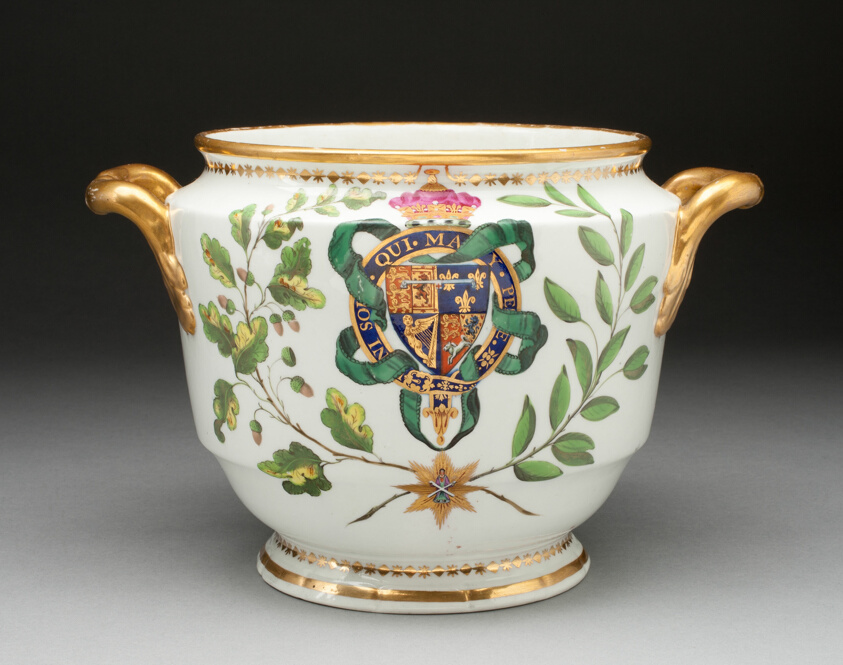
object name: Ceramics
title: Wine Cooler from the Duke of Clarence Service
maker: Worcester Porcelain Factory (Flight Period, 1783–1792); Worcester, England, founded 1751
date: 1789–90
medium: Soft-paste porcelain, polychrome enamels, and gilding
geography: Worcester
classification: ceramics; tableware; porcelain; european decorative arts